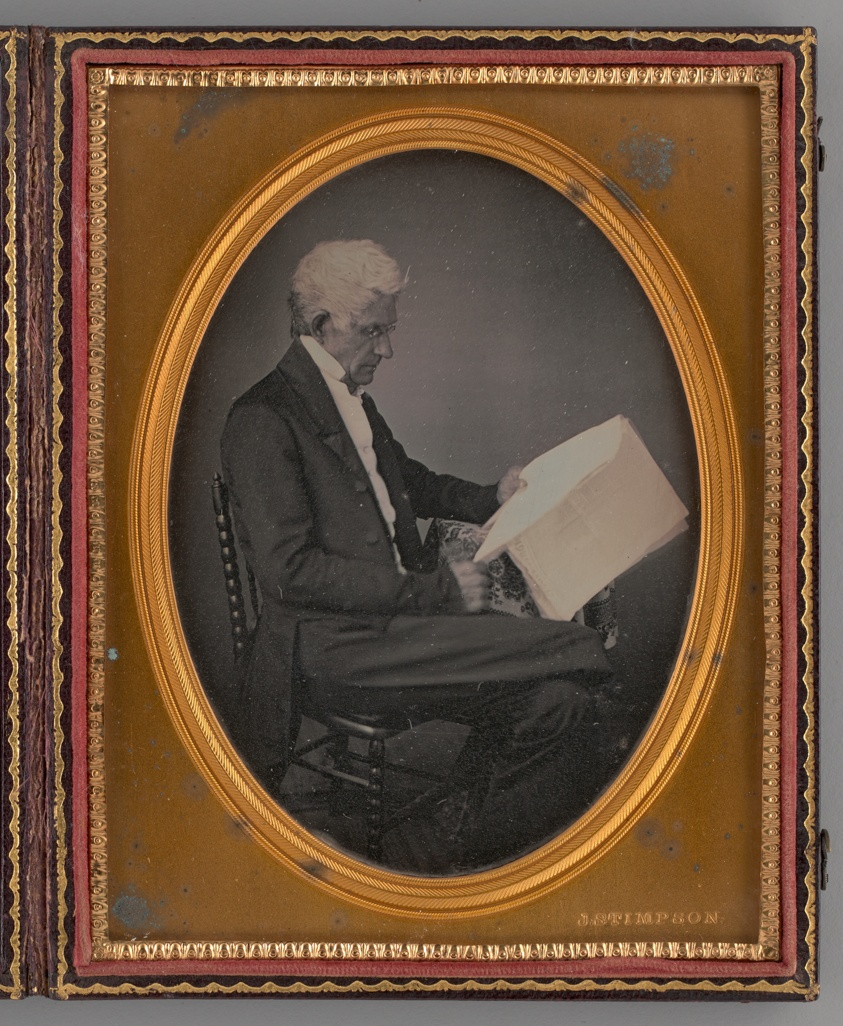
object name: Photograph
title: Untitled (possibly ”Honest John” Davis, Governor of Massachusetts)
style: 19th century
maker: John Stimpson (American, 19th century)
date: 1857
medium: Daguerreotype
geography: United States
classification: portrait; photograph; photographic process; photography; portrait; daguerreotype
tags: lundberg collection, portrait, reading, newspapers, men, Male, portraits, portraits: male subject